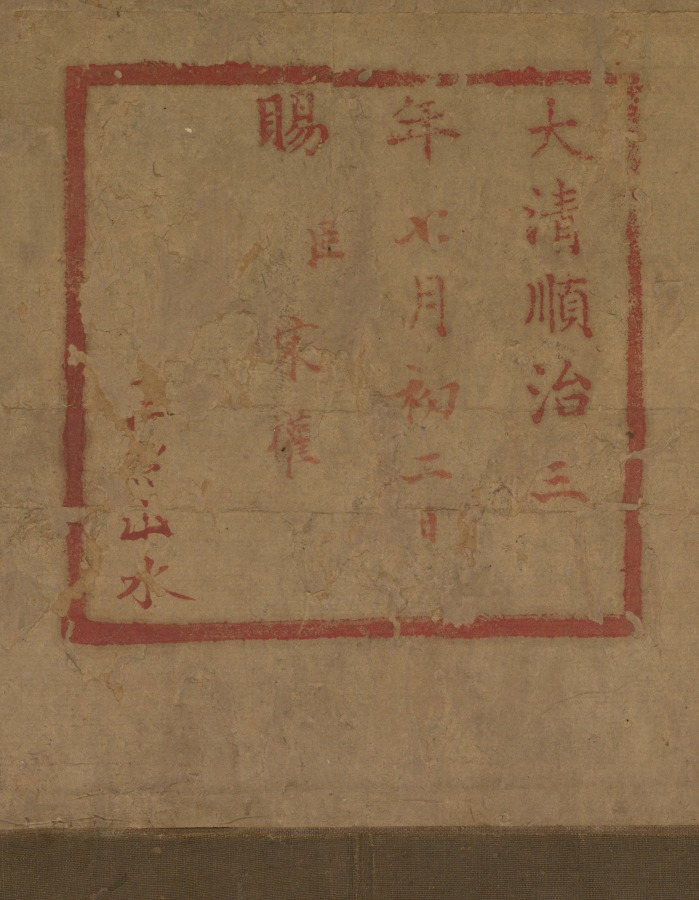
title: Landscape in the Style of Juran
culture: China, Ming dynasty (1368–1644)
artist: attributed to Liu Du (Chinese, active c. 1628-after 1653)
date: 1368–1644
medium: Hanging scroll mounted as a panel; ink and slight color on silk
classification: Painting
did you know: There is a tiny apocryphal signature under the overhanging rocks on the lower left side.